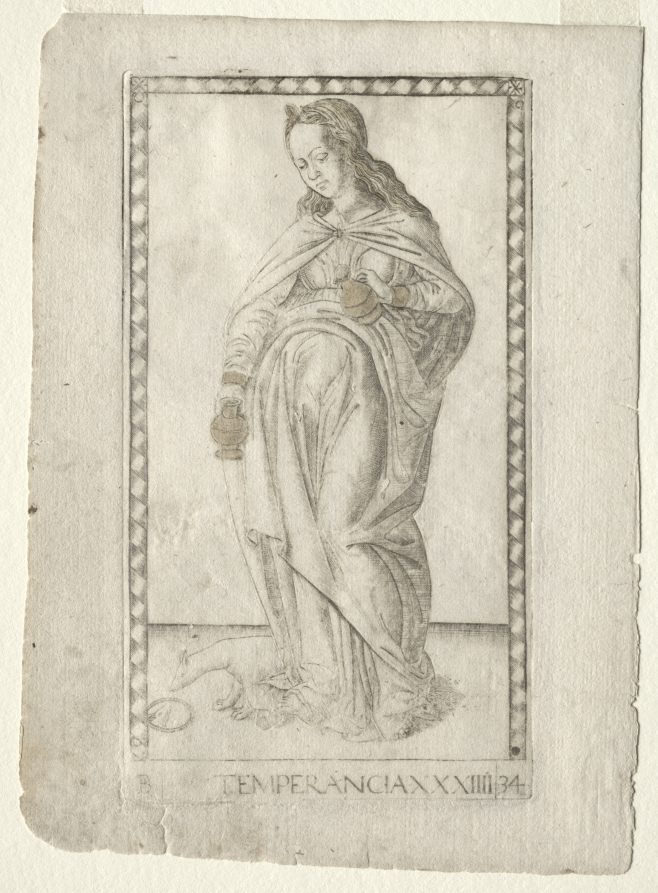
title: Temperance (from the Tarocchi, Series B: Cosmic Principles & Virtues, #34)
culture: Italy, Ferrara, 15th century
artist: Master of the E-Series Tarocchi (Italian, active 1460s)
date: before 1467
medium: engraving, hand-colored with gold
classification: Print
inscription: Lettered below the image of Temperancia (Temperance): ·B· / ·TEMPERANCIA·XXXVIII· / ·34·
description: This engraving is part of the group marked with the letter B, and named Cosmic Principles and the Virtues, comprising the three universal principles (Light, Time, and Space) alongside the three theological virtues (Faith, Hope, and Charity) and the four cardinal ones (Prudence, Temperance, Fortitude, and Justice). The latter were regarded as the basic Christian principles required for a virtuous life. Here personified as a full-length female figure, Temperancia (Temperance) is about to pour the liquid contained in the pitcher she is holding with her left hand into another vessel held in her right hand. Next to her, on the left corner, is an ermine or a weasel, looking at his own reflection in a small round mirror.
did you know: Desirable character traits, such as Temperance, seen here, were often portrayed as beautiful women in the medieval and early modern periods.